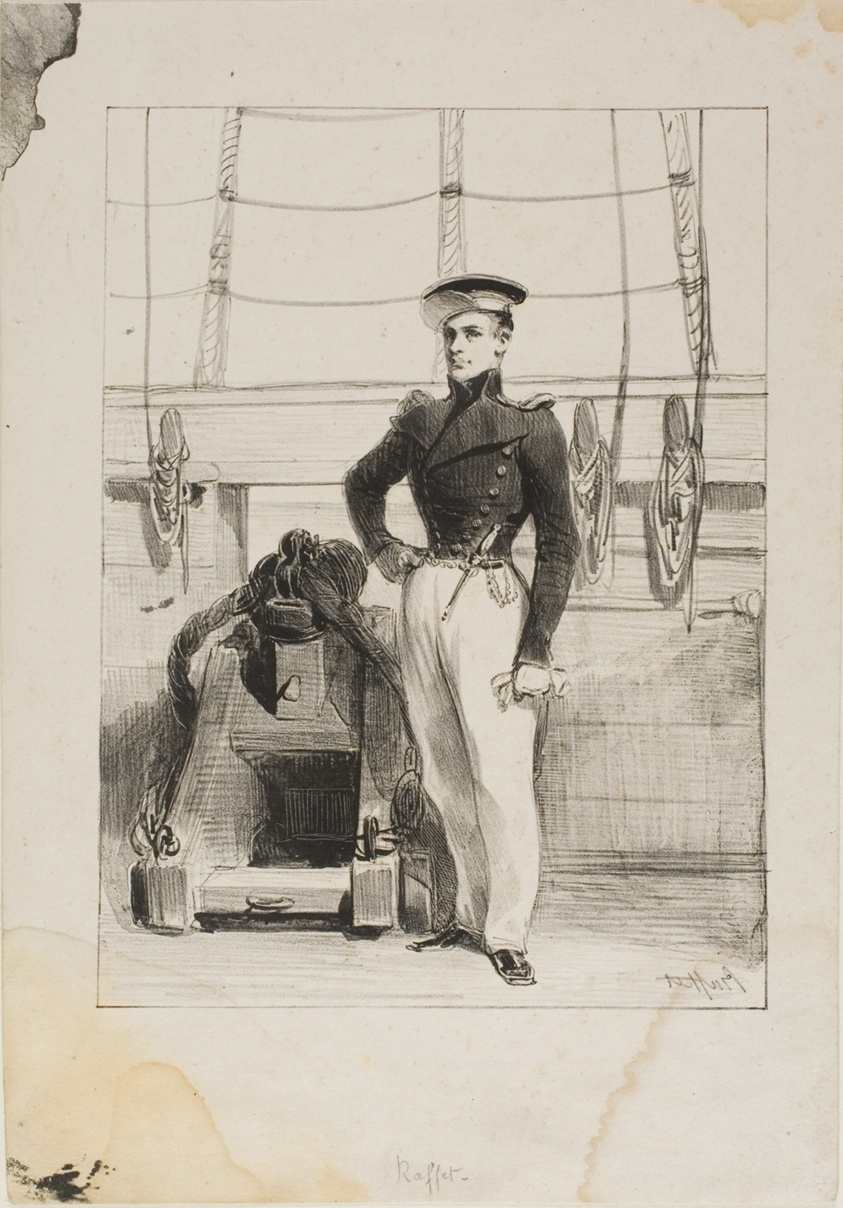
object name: Print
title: Royal Navy, Line Crew, Ship's Ensign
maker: Denis Auguste Marie Raffet (French, 1804-1860)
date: 1830–33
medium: Lithograph in black on ivory wove paper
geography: France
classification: lithograph; print; prints and drawing